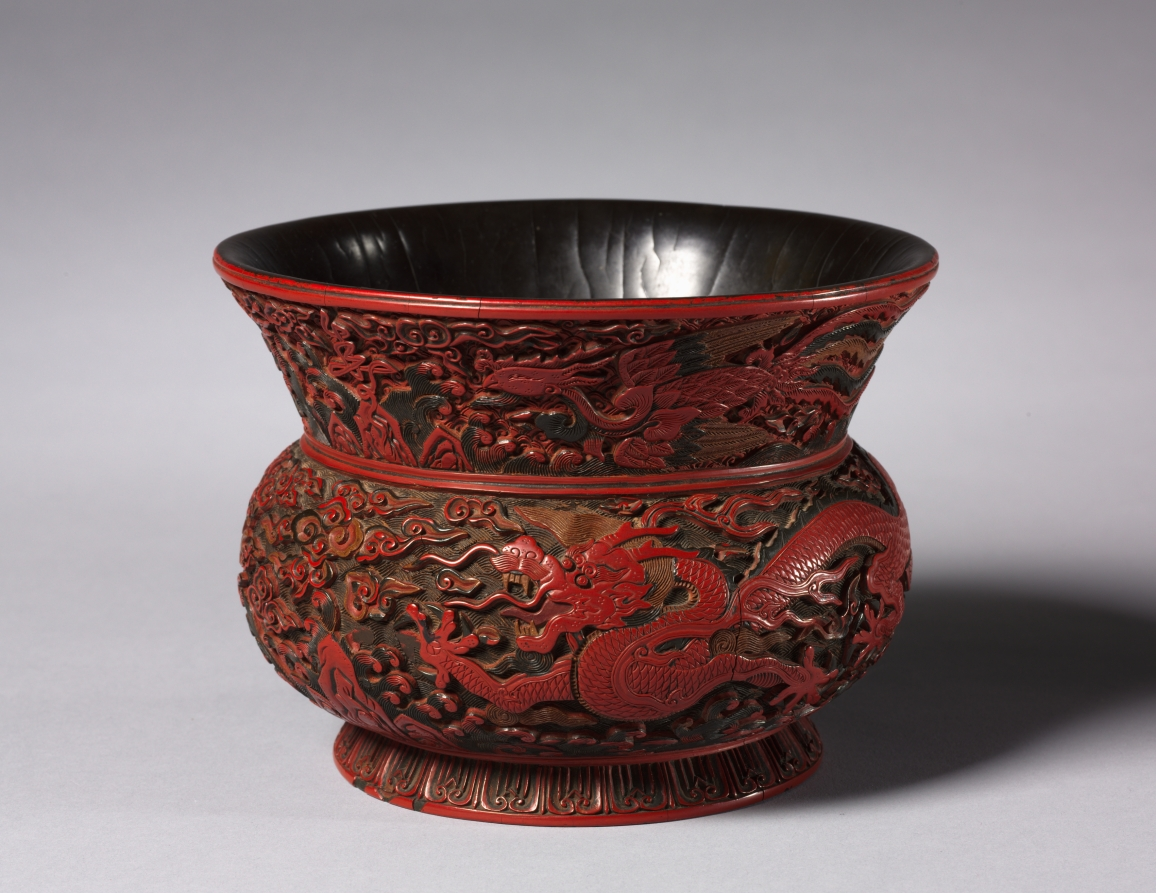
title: Jar with Dragon and Phoenix Design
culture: China, Jiangxi province, Jingdezhen, Ming dynasty (1368-1644), Jiajing mark and reign (1522-66)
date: 1522–66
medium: carved lacquer in cinnabar and other colors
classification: Lacquer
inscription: 大明嘉靖年製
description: A phoenix and dragon alternating with two auspicious ornate characters—“fortune” 福（fu) and “longevity” 壽 (shou)—adorn this exquisitely carved lacquer jar. Similar to contemporary five-color (wucai) decoration on porcelain, this jar shows layers of lacquer in black, ochre, green, and cinnabar (red). In a time-consuming process, a multitude of lacquer coatings were applied to the wooden core before its design could be carved into the surface. The phoenix and dragon are imperial emblems suggesting that this jar was made for the court. The base of the jar is inscribed: “Made in the Jiajing-era of the Great Ming [dynasty].”